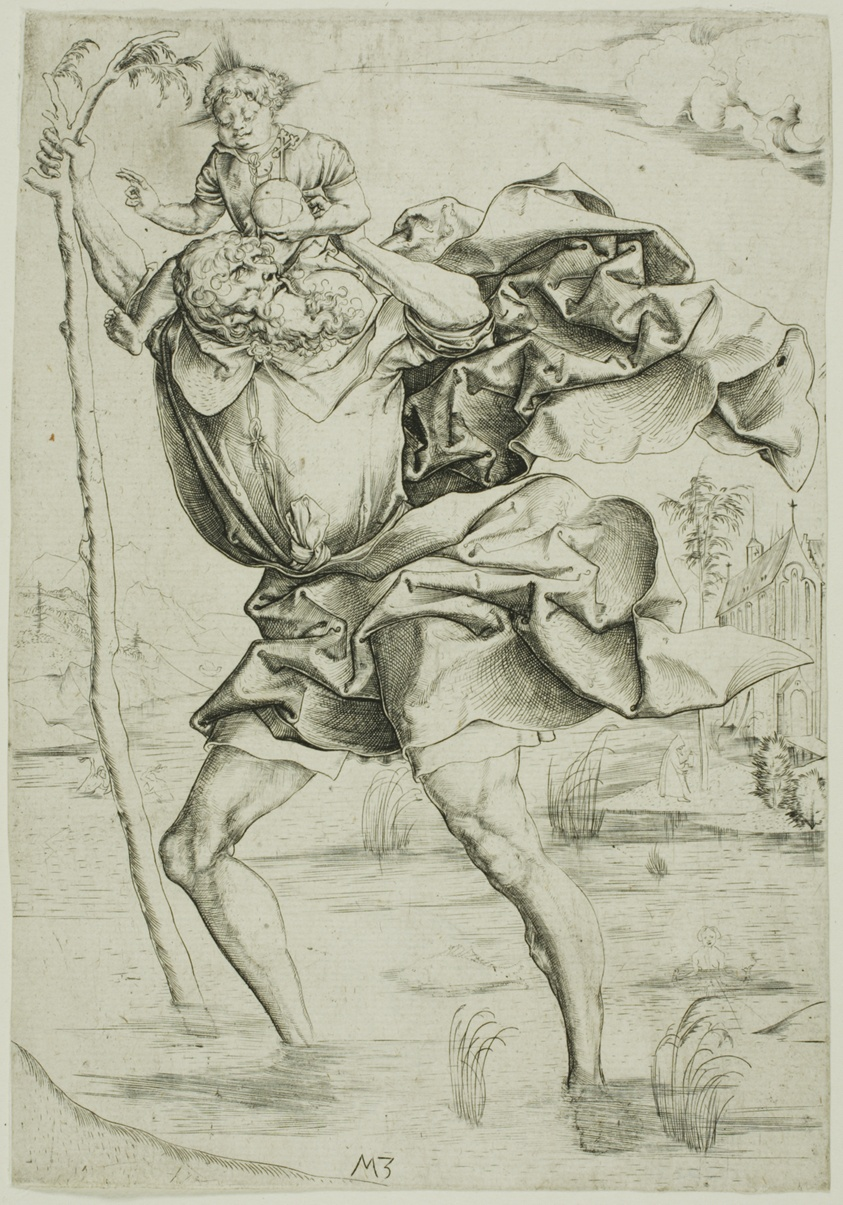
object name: Print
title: Saint Christopher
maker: Master M.Z.; German, active 1500-50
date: c. 1500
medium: Engraving on ivory laid paper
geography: Germany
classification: engraving; print; prints and drawing